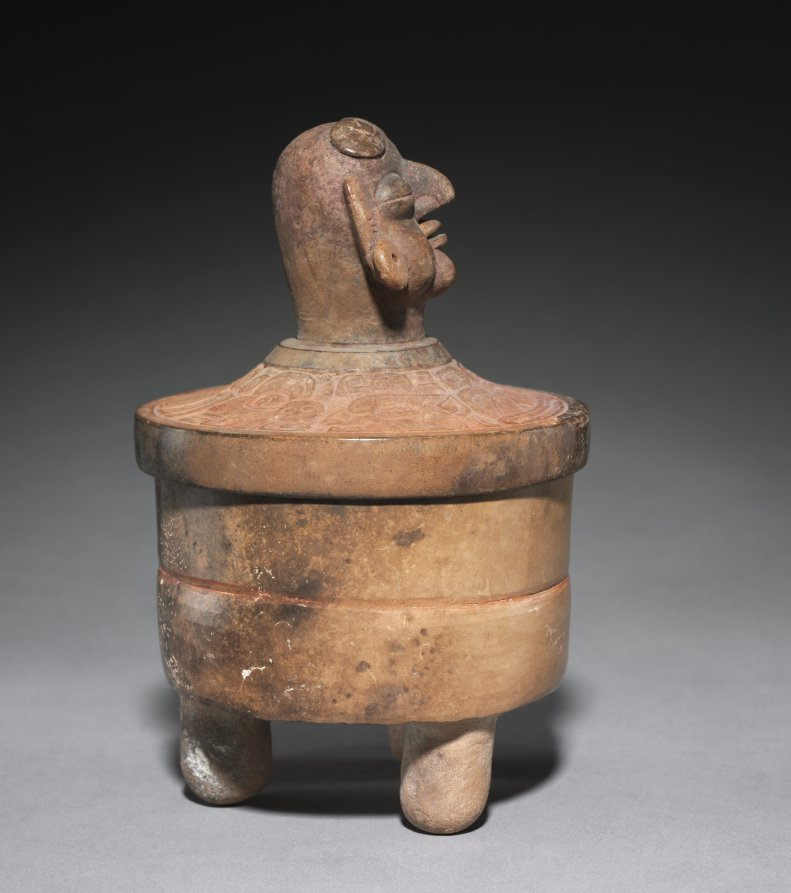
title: Tripod Vessel with Lid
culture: Mexico or Central America, Maya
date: 250–600 CE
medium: earthenware with pigment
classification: Ceramic